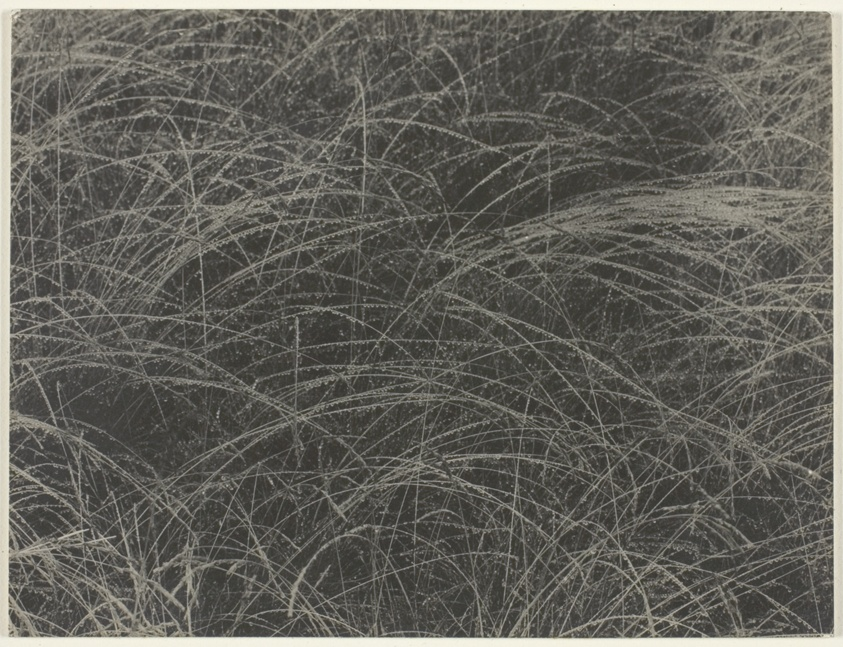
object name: Photograph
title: Equivalent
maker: Alfred Stieglitz (American, 1864–1946)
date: 1927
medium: Gelatin silver print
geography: United States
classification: gelatin silver (developing-out-paper) pr; photographic process; photography; photograph